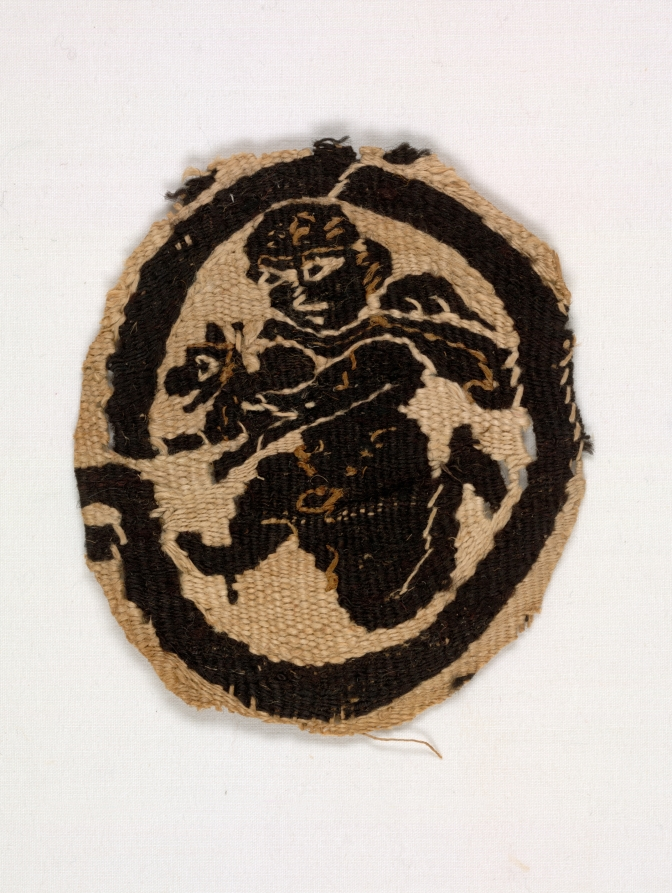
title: Fragment with Running Figure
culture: Egypt, Byzantine period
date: 500s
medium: tapestry; linen and wool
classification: Textile